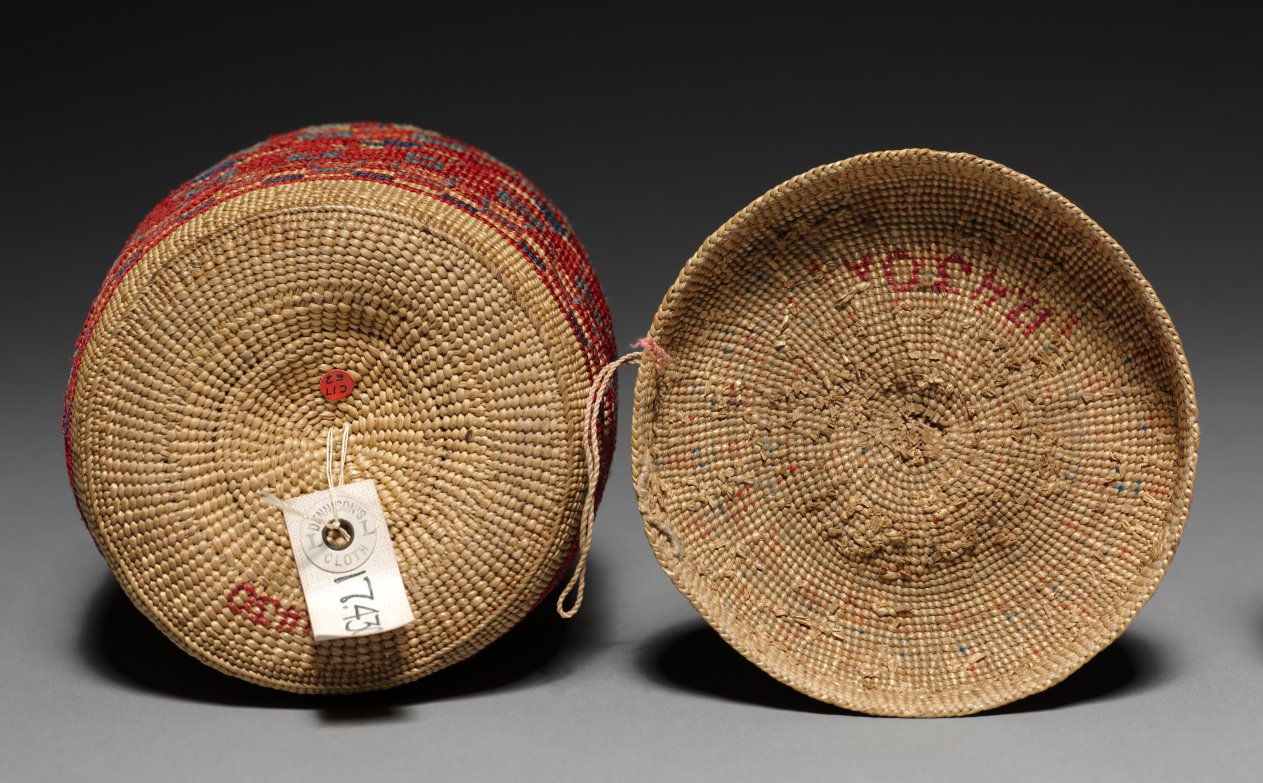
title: Covered Basket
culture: Arctic, Aleut, late 19th-early 20th century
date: late 1800s–early 1900s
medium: wool embroidery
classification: Basketry